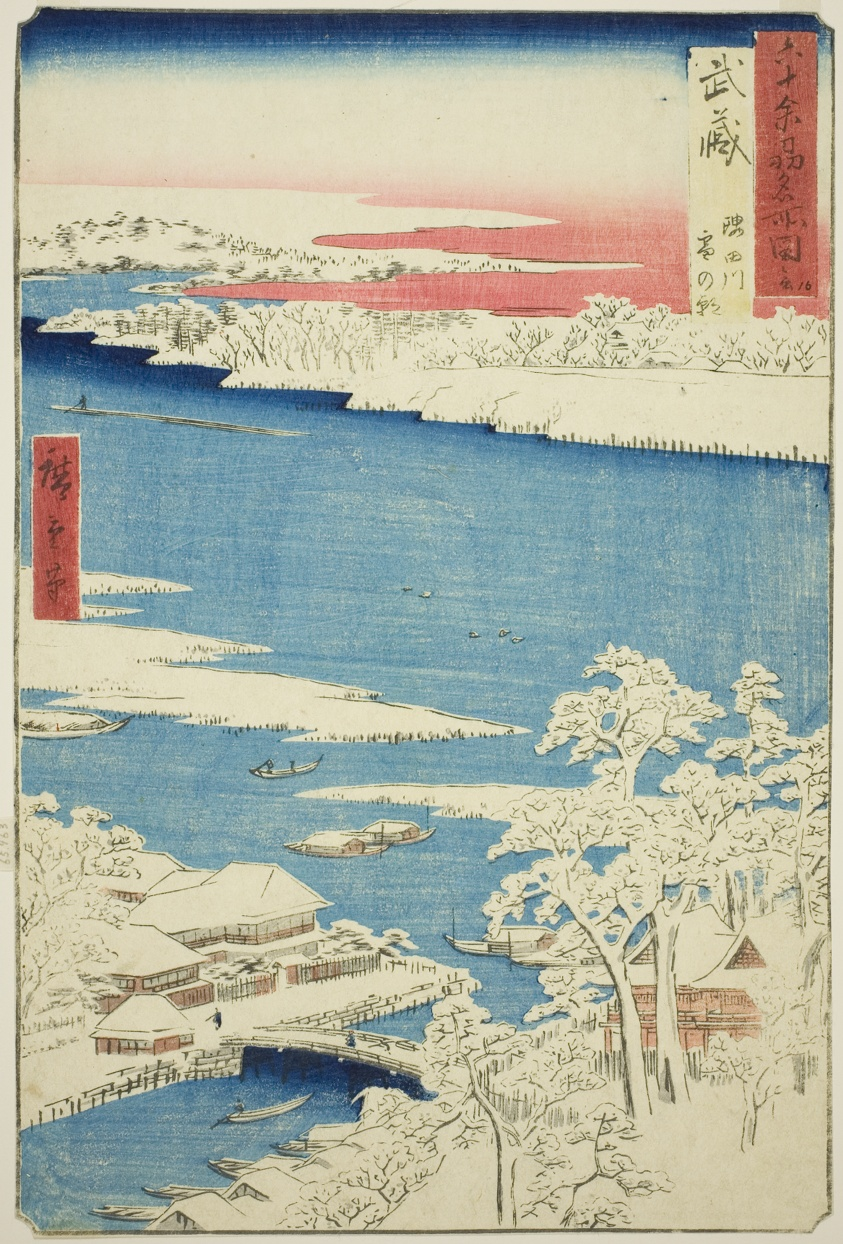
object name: Print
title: Musashi Province: Morning after Snow on the Sumida River (Musashi, Sumidagawa yuki no ashita), from the series "Famous Places in the Sixty-odd Provinces (Rokujuyoshu meisho zue)"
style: Japanese (culture or style)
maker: Utagawa Hiroshige 歌川 広重; Japanese, 1797-1858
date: 1853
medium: Color woodblock print; oban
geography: Japan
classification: woodblock print; print; asian art